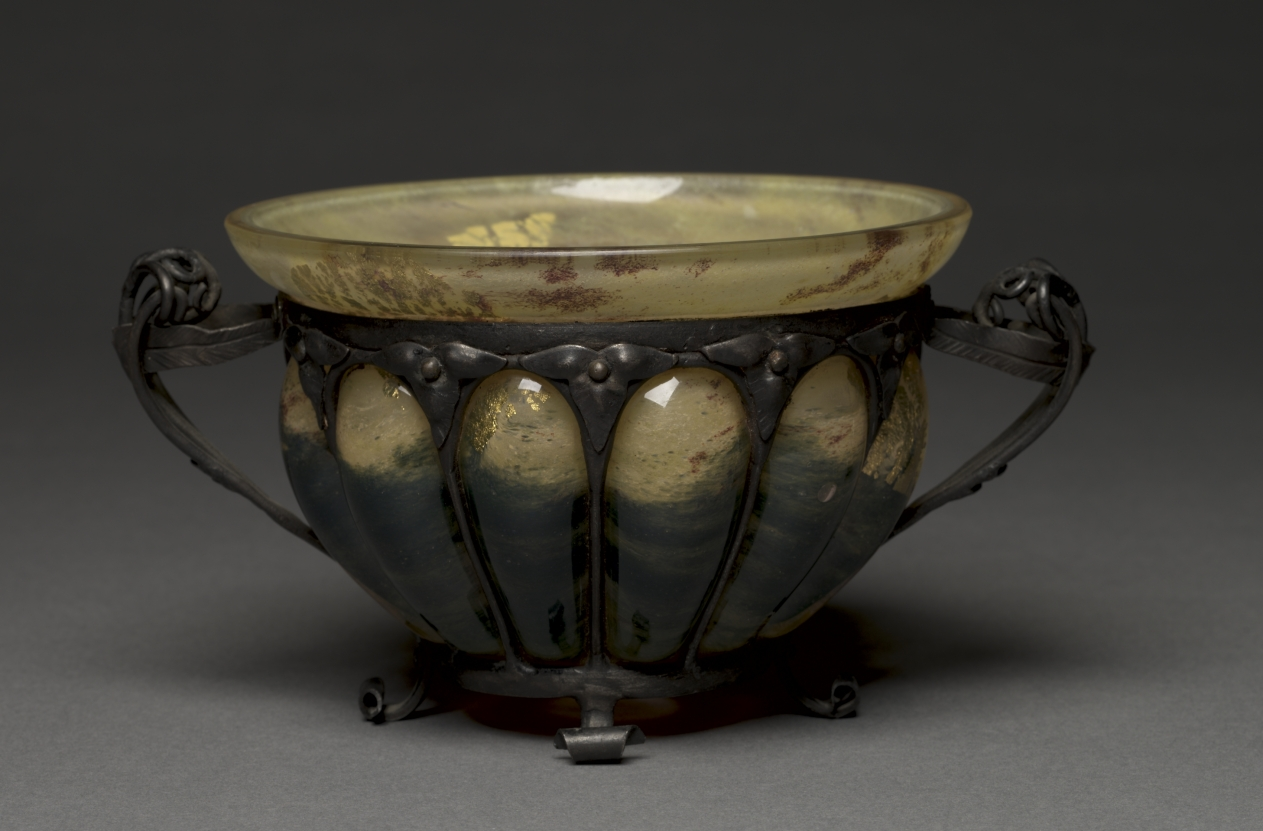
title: Bowl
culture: France, Nancy, 20th century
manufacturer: Daum Brothers (French)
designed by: Louis Majorelle (French, 1859–1926)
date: 1900–1925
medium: glass blown into bronze cage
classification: Glass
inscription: signed on bottom: "Daum/Nancy/ [symbol] / L.Majorelle." Inscribed on rim: "Captain Lawrence Norton/l'Ecole de la Metallurgie de Nancy/1921."